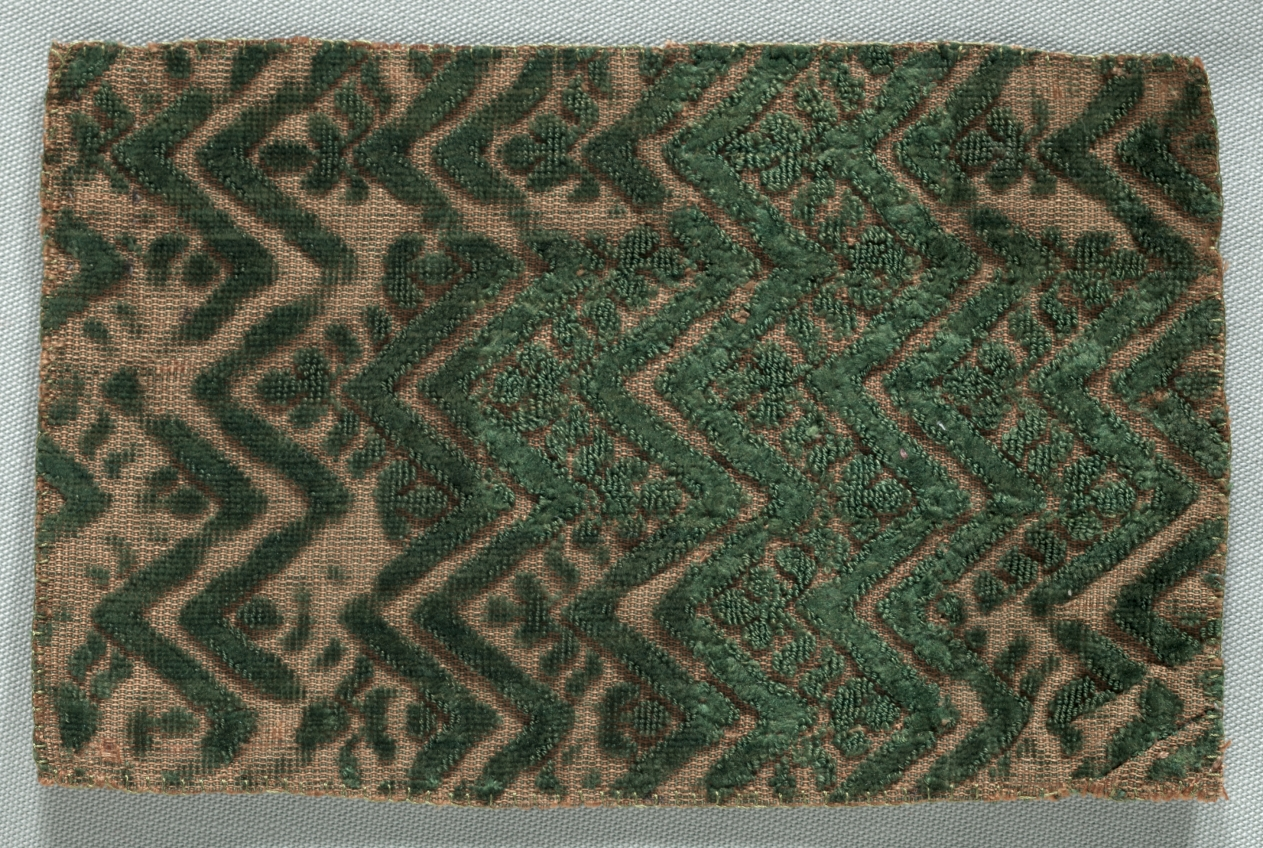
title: Velvet Fragment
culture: Italy, late 16th - 17th century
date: late 1500s - 1600s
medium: velvet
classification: Velvet